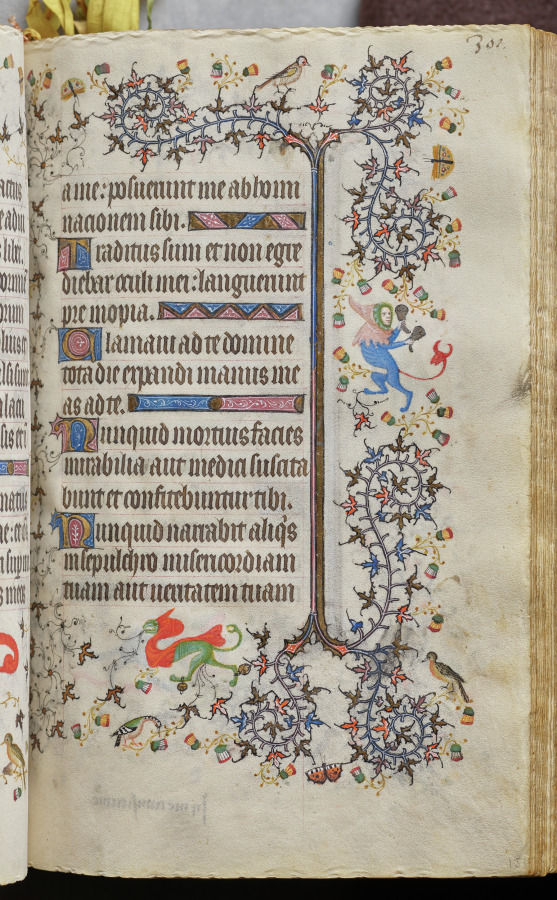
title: Hours of Charles the Noble, King of Navarre (1361-1425): fol. 151r, Text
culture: France, Paris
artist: Master of the Brussels Initials and Associates (French)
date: c. 1405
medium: ink, tempera, and gold on vellum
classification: Bound Volume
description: This precious volume was obviously highly prized by its owner, the French-born King of Navarre, who had his coat of arms painted on no less than twenty folios. Rather than directly commissioning this manuscript from a specific workshop, it seems that Charles the Noble acquired his book of hours -- perhaps ready-made for the luxury market -- while on a trip to Paris in 1404-05. A collaborative effort, six painting styles are evidenced within the pages of this codex, those of two Italians, two Frenchmen, and two Netherlanders. The painter who was responsible for the planning and decoration of the book, and who produced seventeen of the large miniatures, was a Bolognese artist known as the Master of the Brussels Initials. His principal assistant, responsible for most of the borders, was a Florentine who signed his name "Zecho" da Firenze on folio 208 verso.